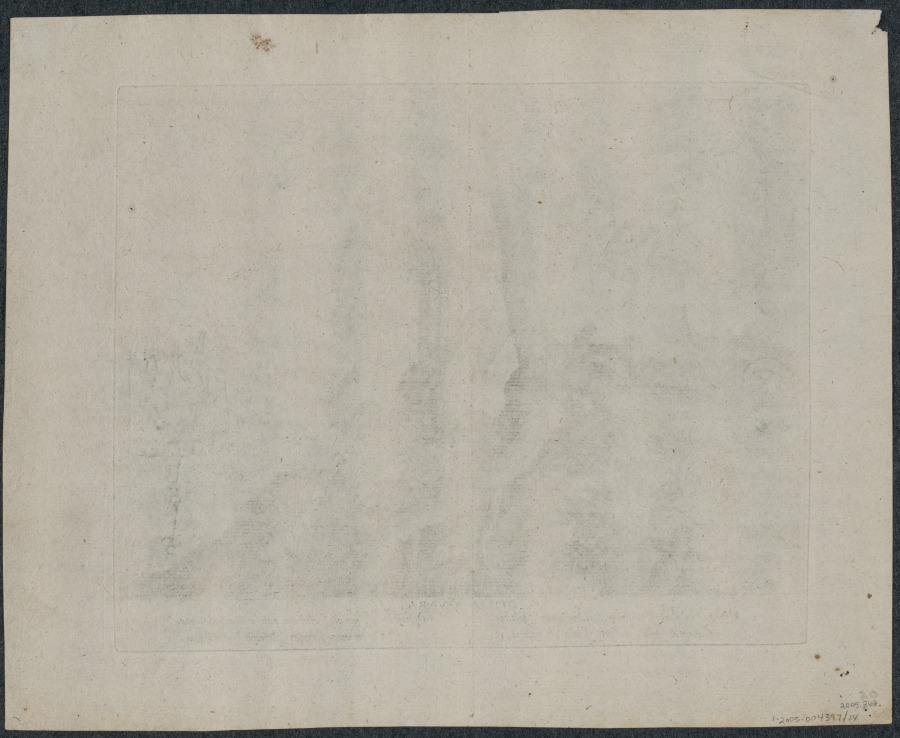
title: Otilia Bavara (Saint Otilia of Bavaria)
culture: Flanders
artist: Adriaen Collaert (Flemish, 1560–1618)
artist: after Maarten de Vos (Flemish, 1532–1603)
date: c. 1580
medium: engraving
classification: Print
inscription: lower margin, in graphite: 21